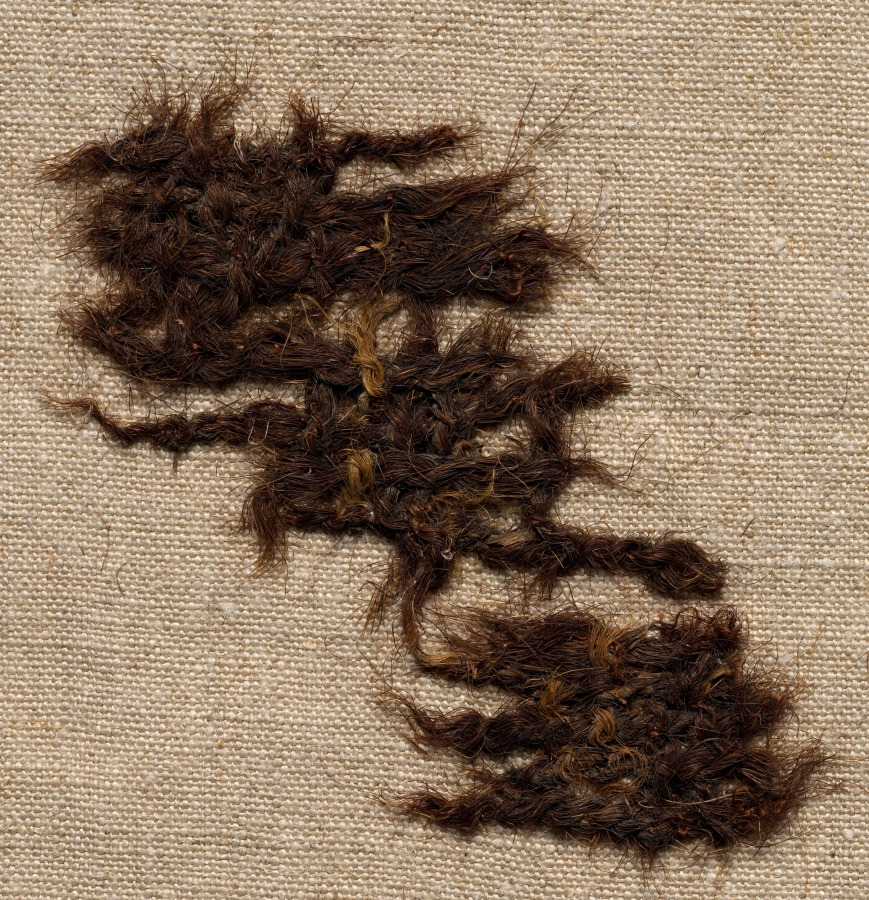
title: Fragment of Tabby Cloth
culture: Syria, Dura-Europos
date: 200s CE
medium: goat hair: tabby weave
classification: Textile